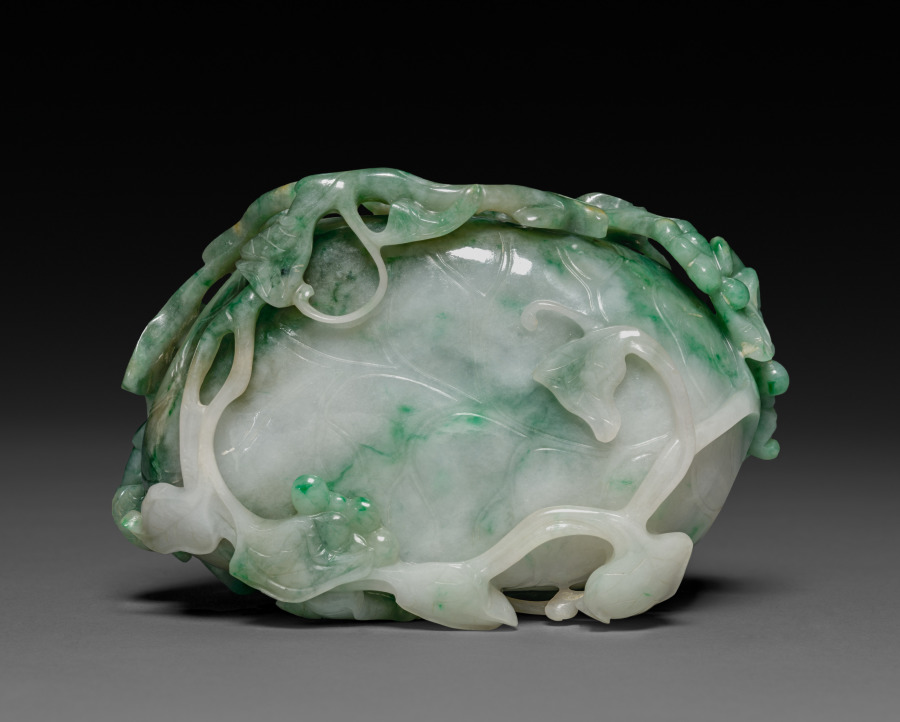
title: Brushwasher in Shape of Lotus Leaf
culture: China, Qing dynasty (1644-1911)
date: 19th Century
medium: translucent jadeite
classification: Jade